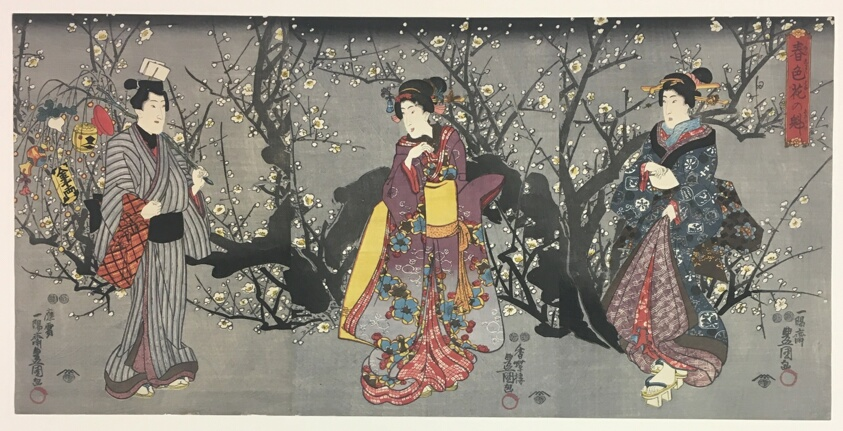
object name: Print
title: Cherry Blossom Viewing (Shunchaku hana no shizuku)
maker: Utagawa Kunisada I (Toyokuni III) (Japanese, 1786-1864)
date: c. 1833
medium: Color woodblock prints; oban triptych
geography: Japan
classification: woodblock print; print; asian art